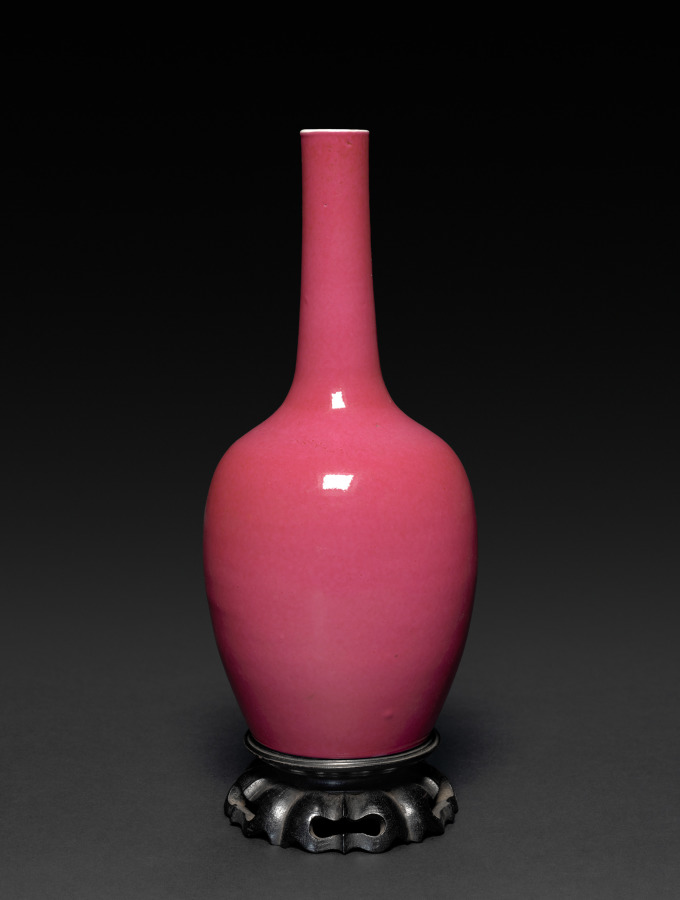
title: Vase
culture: China, Qing dynasty (1644-1911)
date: 1800s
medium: porcelain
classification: Ceramic